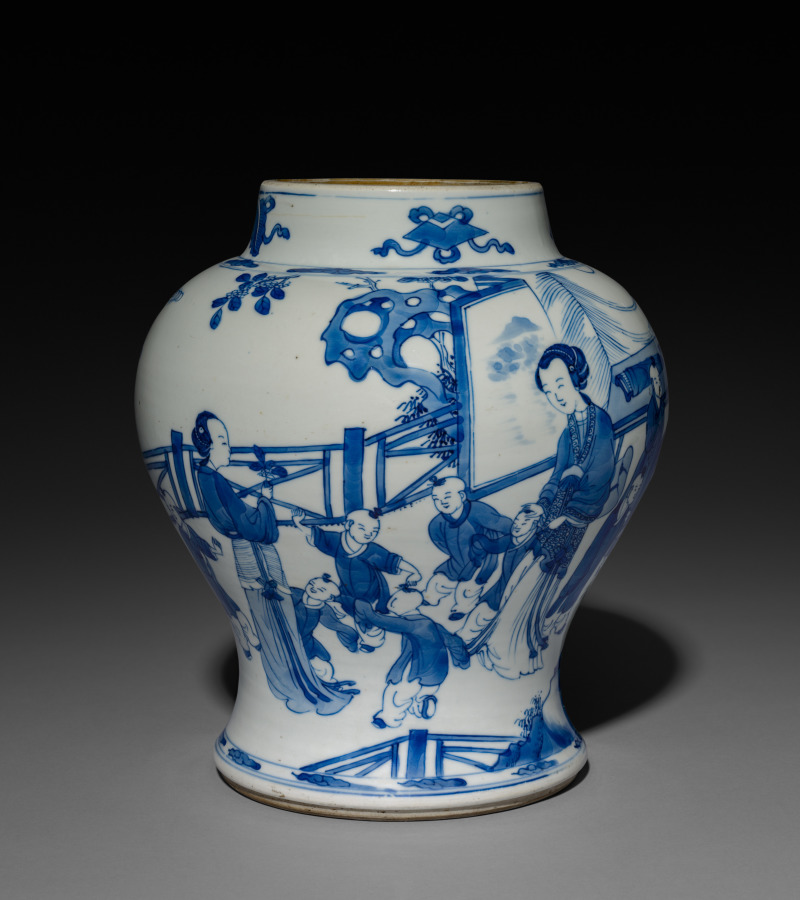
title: Vase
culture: China, Qing dynasty (1644–1911), Qianlong reign (1736–95)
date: 1736–95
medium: porcelain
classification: Ceramic